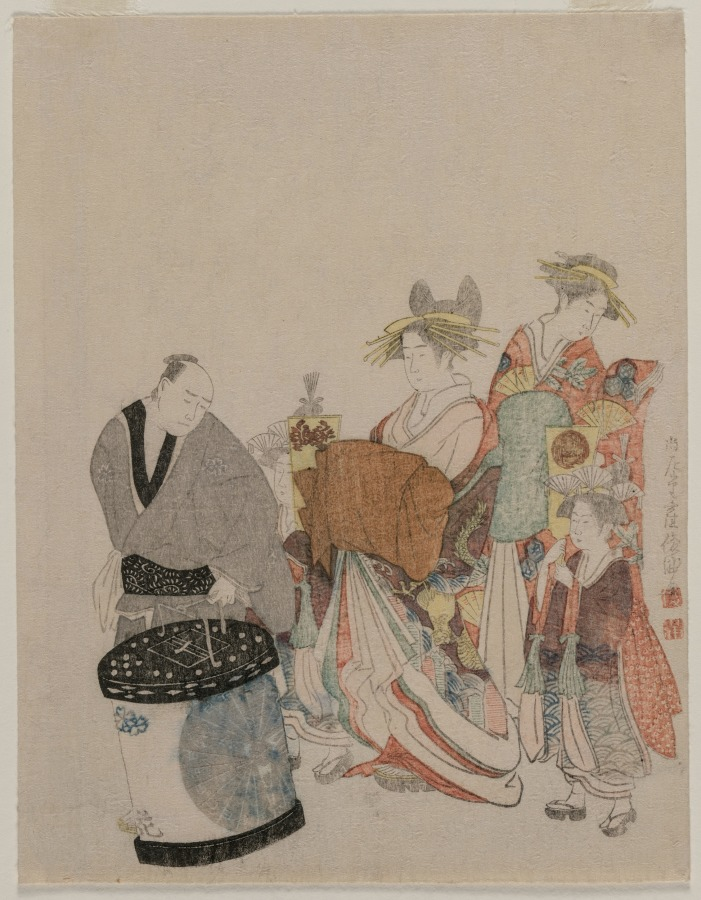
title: Courtesan on the Town with Attendants at Night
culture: Japan, Edo period (1615–1868)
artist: attributed to Kubo Shunman (Japanese, 1757–1820)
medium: color woodblock print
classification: Print